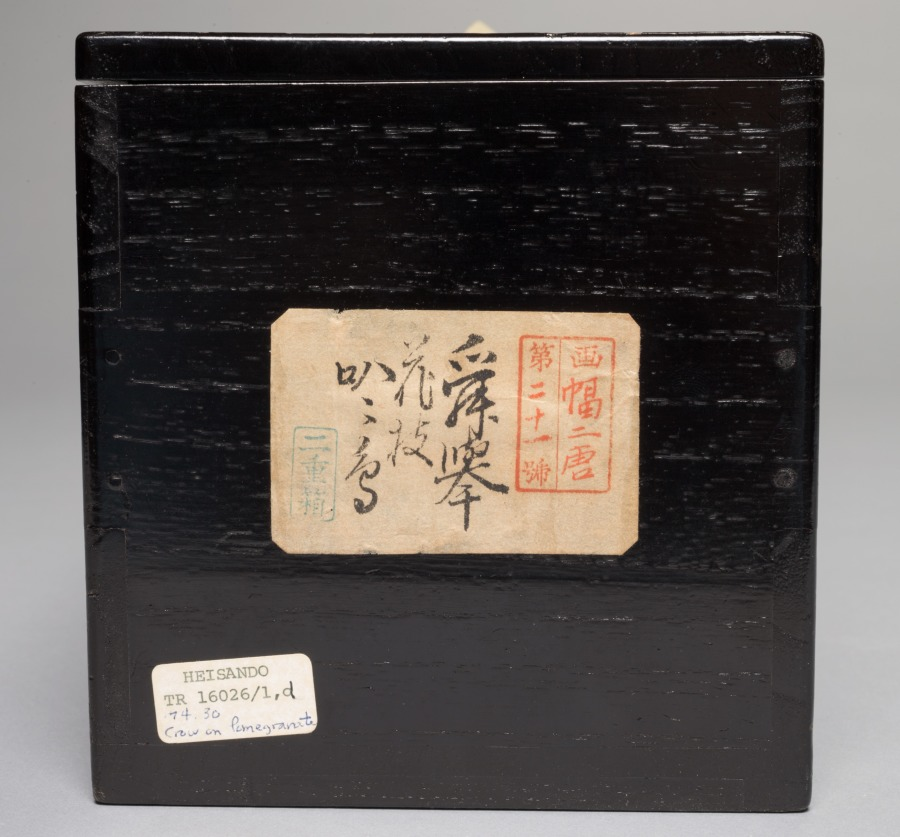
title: Crow on a Pomegranate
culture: Japan, Muromachi period (1392–1573)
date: 1500s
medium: hanging scroll; ink on paper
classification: Painting